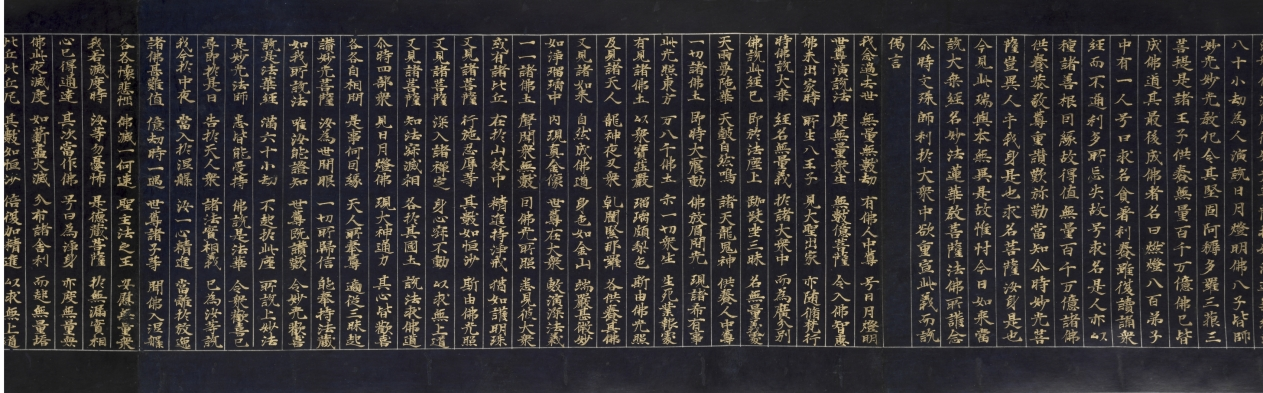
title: Lotus Sutra with a Frontispiece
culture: China, Song dynasty (960–1279)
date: late 1100s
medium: handscroll; gold ink on indigo sutra paper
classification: Painting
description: The frontispiece of this sutra, a sacred Buddhist scripture, illustrates episodes mentioned in the Buddha’s teaching. The sutra begins with a description of the historic Buddha Shakyamuni’s assembly on Vulture Peak. On the right, the Buddha sits amid members of his congregation: lohans (or arhats), bodhisattvas, gods, and other beings. The narrative proceeds from right to left. Heavenly light emanates from Shakyamuni’s brow to “illuminate the eighteen thousand worlds to the east.” Illustrated immediately below the ray is the sutra’s promise that if anyone carves or paints images of the Buddha “they will achieve the Buddha path.” The female figures in the frontispiece point to another promise made in this popular Mahayana school sutra, namely that female devotees and nuns who read the sutra are promised Buddhahood and salvation.